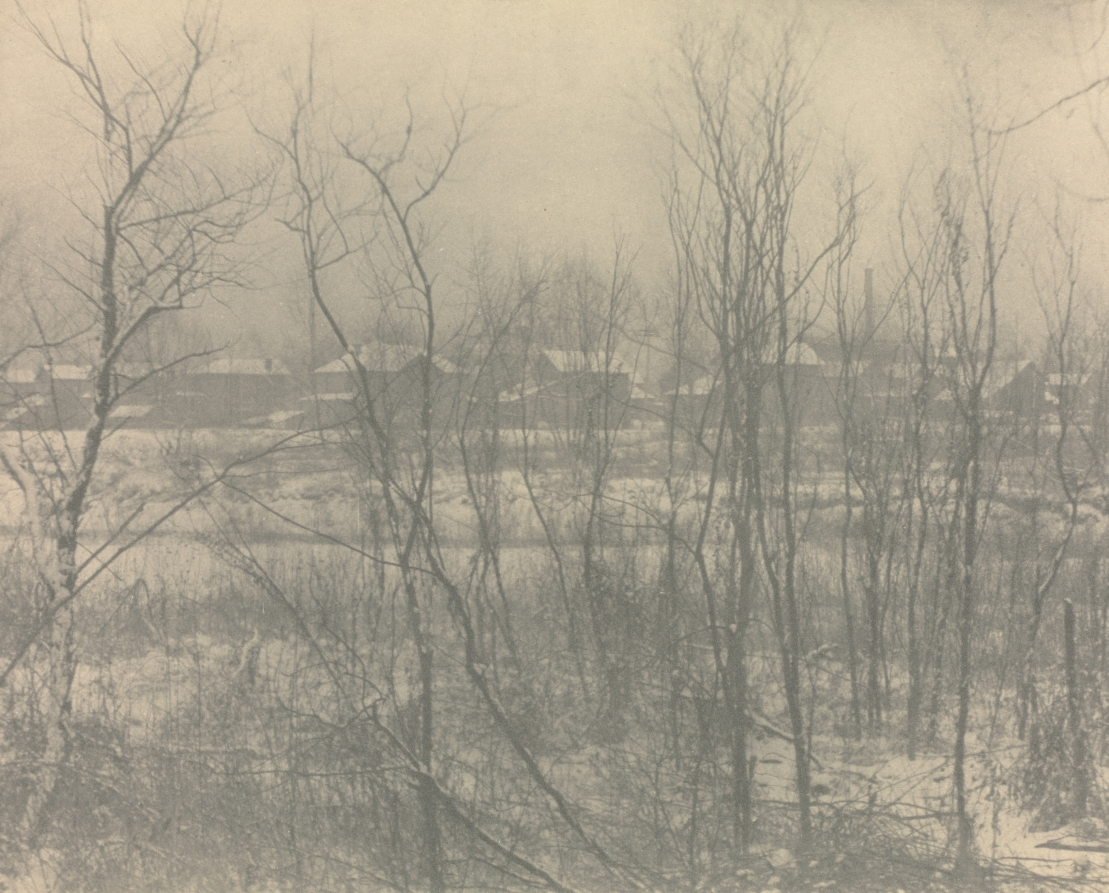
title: Camera Work: Landscape - Winter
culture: America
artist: Clarence H. White (American, 1871–1925)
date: 1908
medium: photogravure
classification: Bound Volume